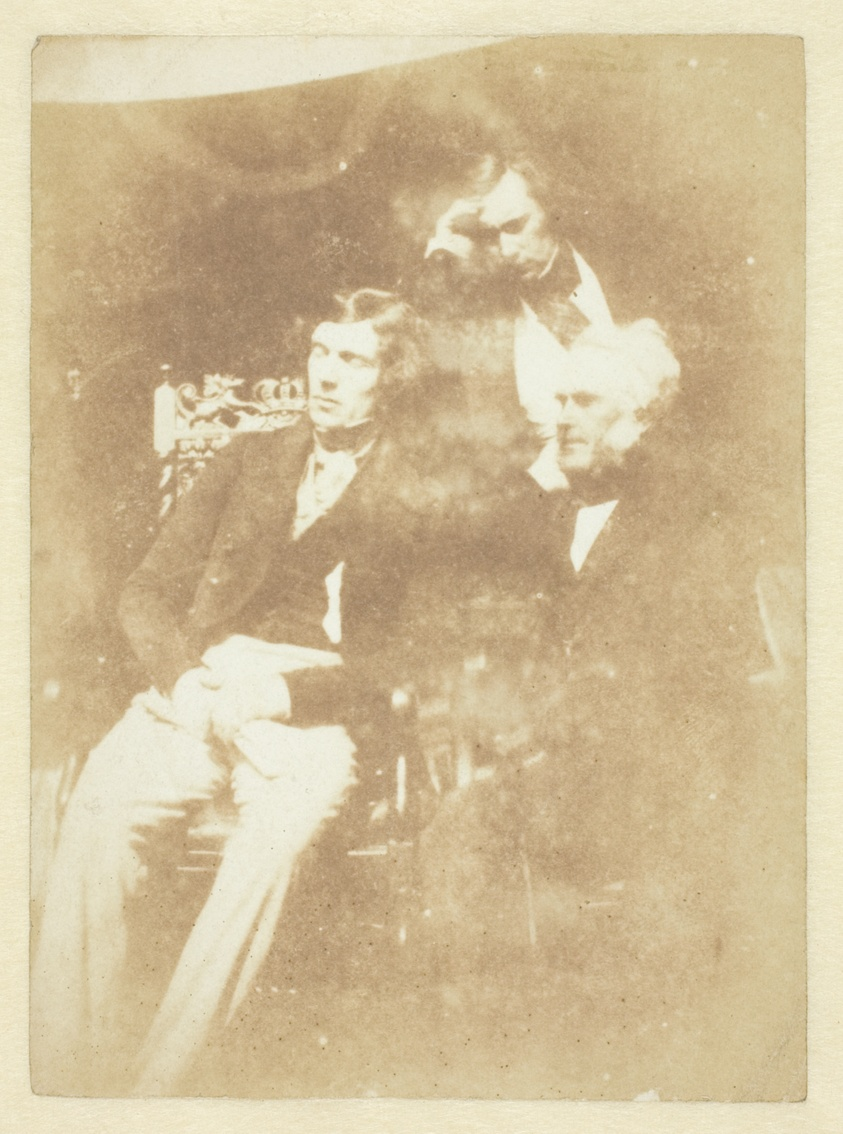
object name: Photograph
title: James Gordon, William Hanna D.D. and 'Mr. Cowan'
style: 19th century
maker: David Octavius Hill; Scottish, 1802–1870; Robert Adamson; Scottish, 1821–1848; William Henry Fox Talbot (Formerly attributed to); English, 1800–1877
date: 1843/47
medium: Salted paper print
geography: Scotland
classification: salted paper print; photographic process; photography; photograph